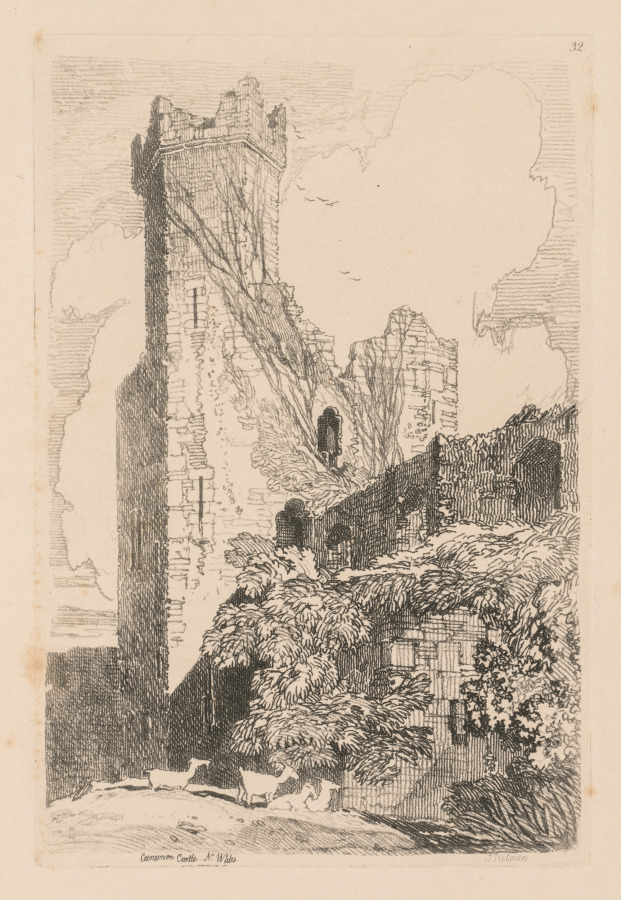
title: Liber Studiorum: Plate 32, Caernarvon Castle, N. Wales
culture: England, 19th century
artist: John Sell Cotman (British, 1782–1842)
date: 1838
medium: softground etching, from a bound volume containing 48 plates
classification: Bound Volume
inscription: In plate, within image, upper right: 32; in plate, lower left, below image: Caernarvon Castle. N. Wales; in plate, lower right, below image: JS Cotman